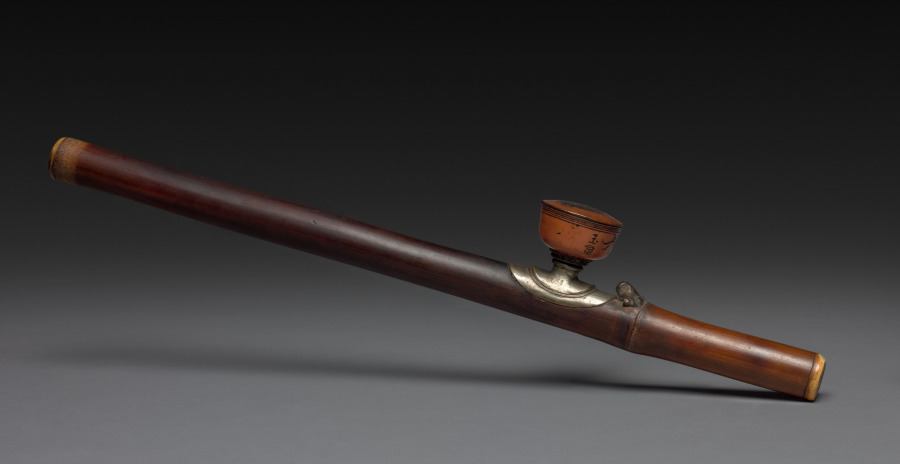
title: Opium Pipe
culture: China, Qing dynasty (1644-1911) or Republican period (1912-49)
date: early 1900s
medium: bamboo with ivory tip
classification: Miscellaneous